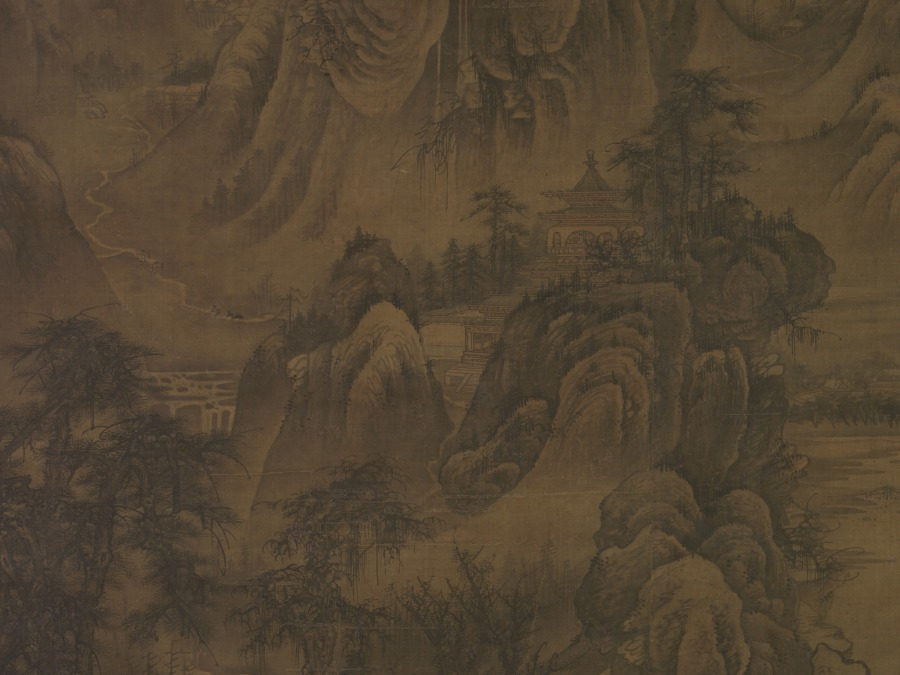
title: Landscape in the Style of Juran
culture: China, Ming dynasty (1368–1644)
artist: attributed to Liu Du (Chinese, active c. 1628-after 1653)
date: 1368–1644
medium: Hanging scroll mounted as a panel; ink and slight color on silk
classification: Painting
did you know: There is a tiny apocryphal signature under the overhanging rocks on the lower left side.